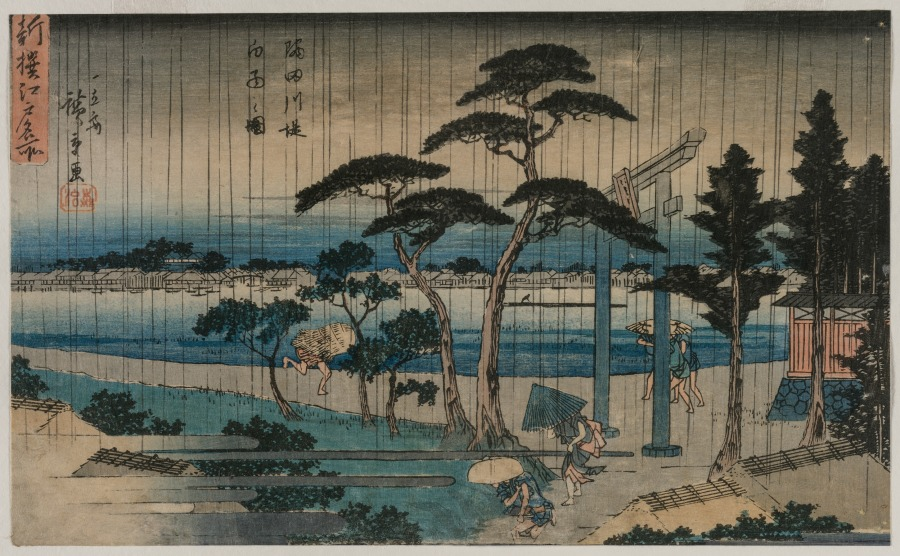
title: Picture of Light Rain on the Embankment of the Sumida River, from the series A New Selection of Famous Places in Edo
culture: Japan, Edo period (1615–1868)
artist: Utagawa Hiroshige (Japanese, 1797–1858)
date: late 1830s or early 1840s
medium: color woodblock print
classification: Print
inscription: Signature: Ichiryusai Hiroshige ga Publisher: Moriya Jihei (Moriji)